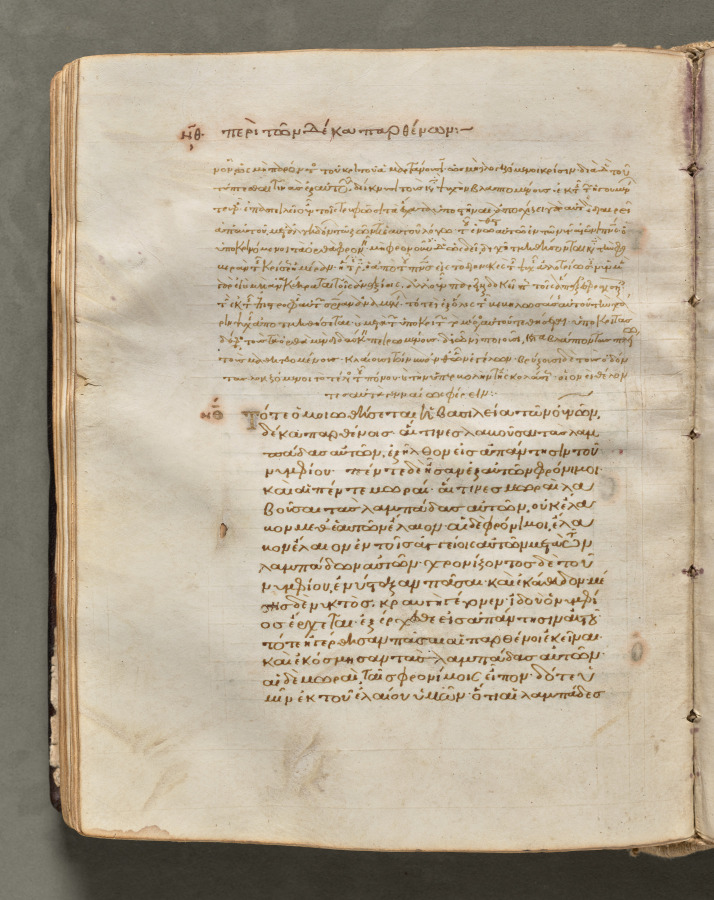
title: Text, folio 109 (verso), from a Gospel Book with Commentaries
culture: Byzantium, Constantinople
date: c. 1000–1100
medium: ink, tempera, and gold on vellum; leather binding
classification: Bound Volume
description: Each of the four gospels in this book opens on a page with brilliantly illuminated borders depicting the author of the text as well as birds-principally peacocks, symbols of the immortality of the soul-and fountains, representing the fountain of life and the salvation of the soul. This volume consists of 428 leaves with texts in Greek. Its level of sophistication suggests that it was probably written and decorated in a monastery in Constantinople.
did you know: Gospel Books were carried in procession through Byzantine churches.